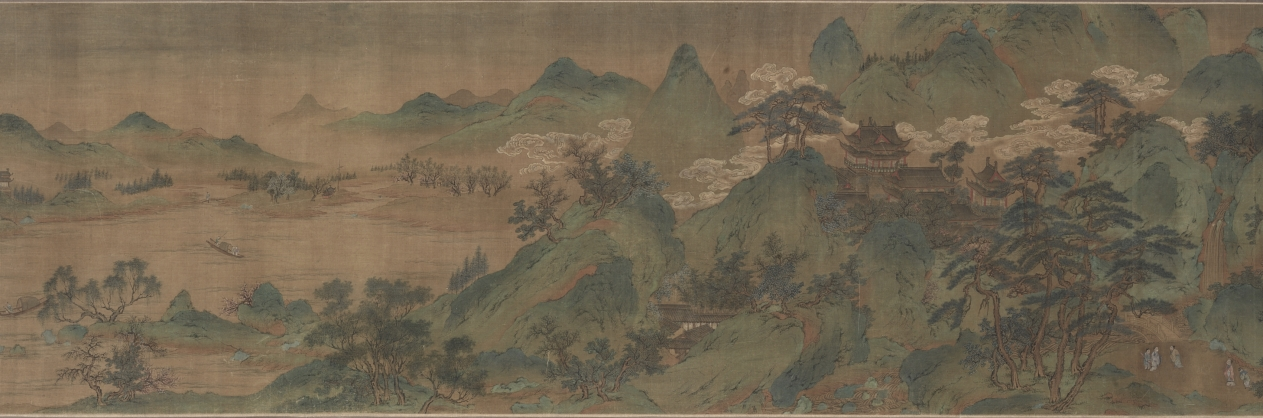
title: Landscape, The Palace of the Clouds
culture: China, Qing dynasty (1644-1911)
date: 1644–1911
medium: handscroll, ink on silk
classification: Painting